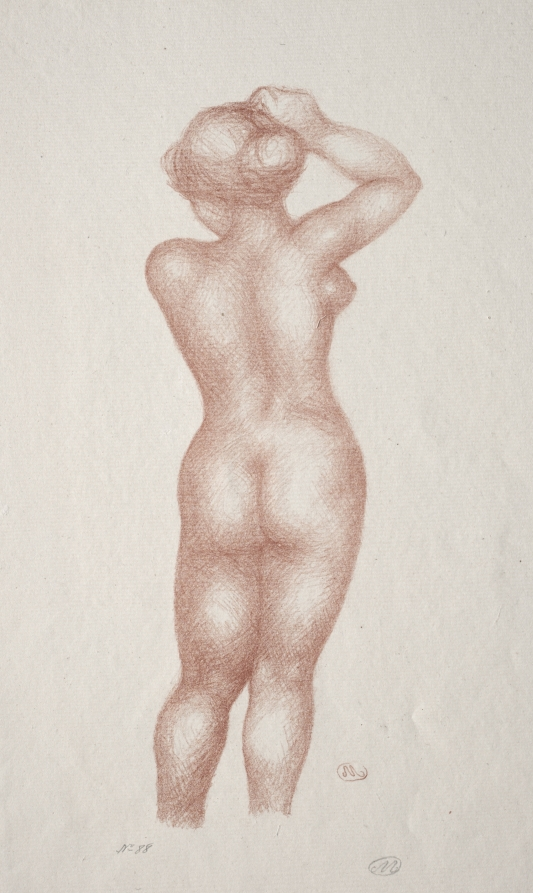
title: Nude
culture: France, 20th century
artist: Aristide Maillol (French, 1861–1944)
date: c. 1900–1944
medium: lithograph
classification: Print